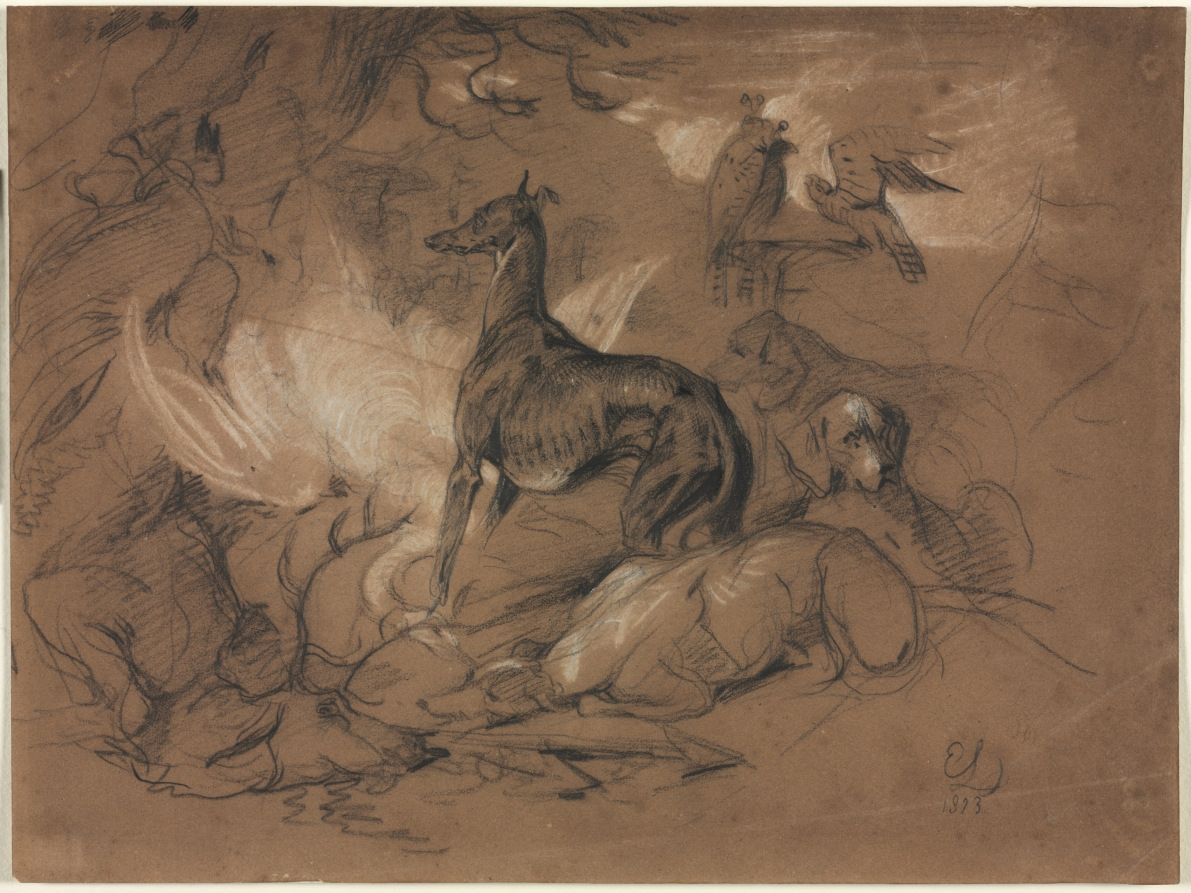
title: Studies of Animals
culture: England, 19th century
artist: Edwin Henry Landseer (British, 1802–1873)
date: 1873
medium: charcoal and pencil heightened with white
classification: Drawing